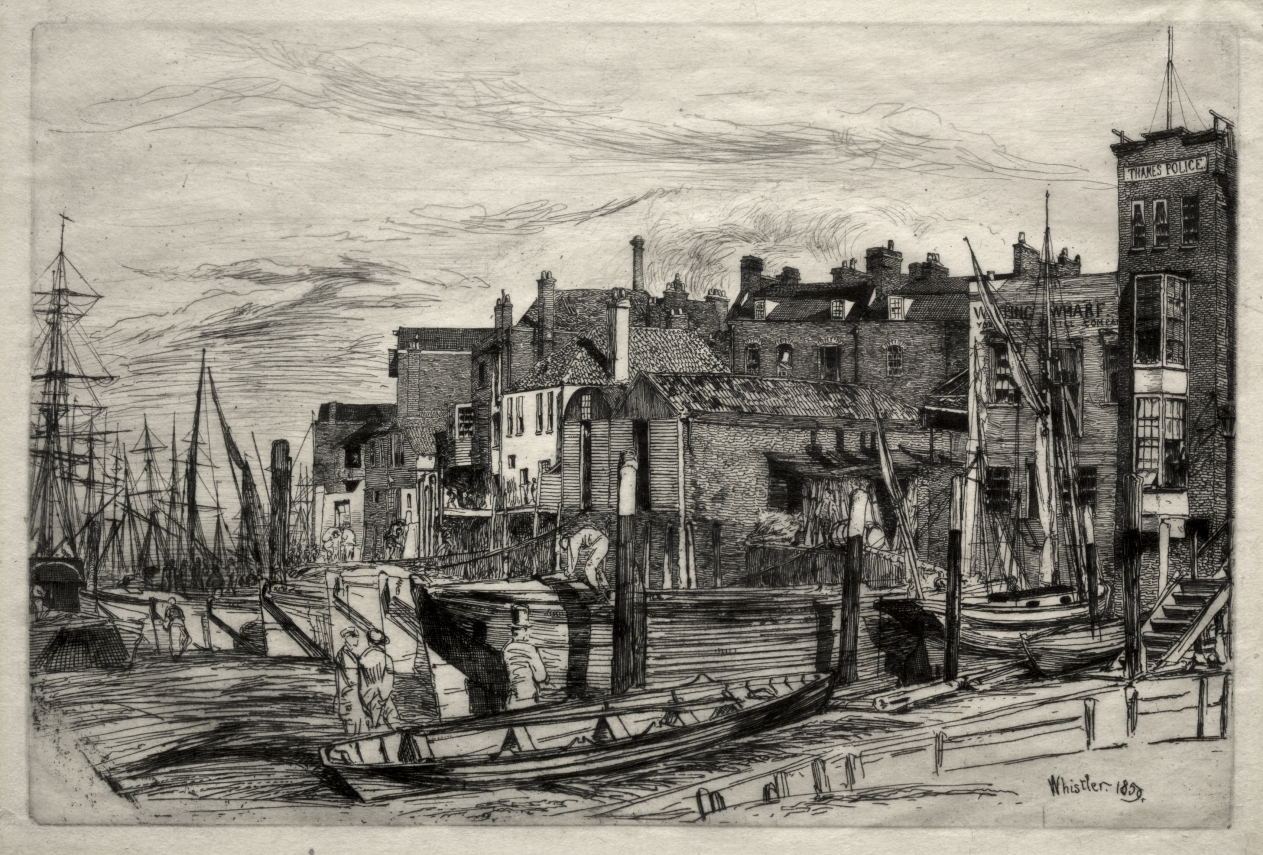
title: Thames Police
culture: America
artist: James McNeill Whistler (American, 1834–1903)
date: 1859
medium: etching and drypoint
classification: Print